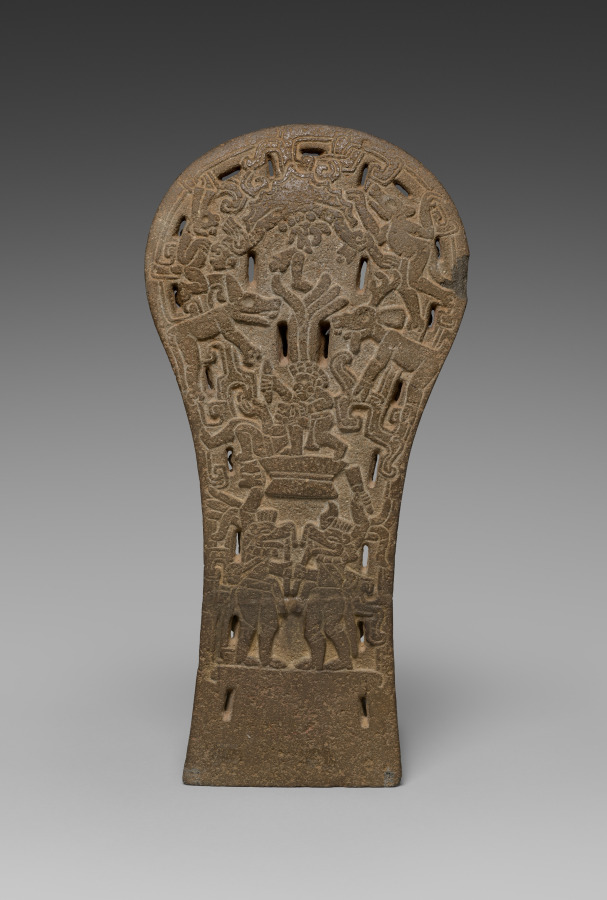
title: Ballgame Palma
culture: Mexico, Gulf Coast, Classic Veracruz style (600-1100)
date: c. 900–1100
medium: stone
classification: Sculpture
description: Stone palmas—so-called today for their palm frond-like shape—are ceremonial sculptures that may replicate lightweight gear worn over the chest during the ballgame. The scene on the back of this palma vividly illustrates the tie between the ballgame and sacrifice. A bat descends from the top, clutching severed human body parts, and at the center an upright figure brandishes a blade over a reclining victim. The scene's many animal figures, including the one on the front, may belong to ballgame mythology that now is lost.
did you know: The Mesoamerican ballgame was played with a hard rubber ball that players bounced off their hips.